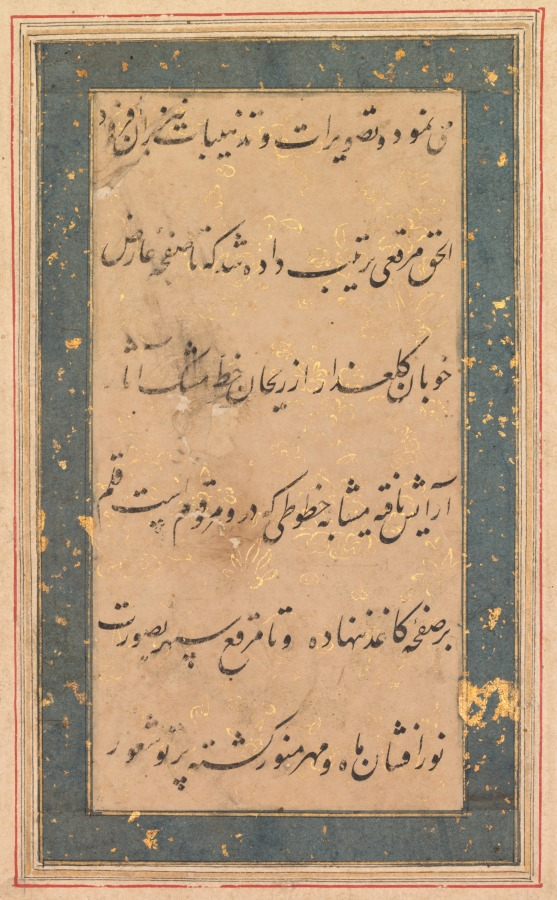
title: Calligraphy: Preface to the Anvar-i Suhaili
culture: Northern India, Mughal court, 16th century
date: c. 1590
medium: Gum tempera, ink, and gold on paper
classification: Calligraphy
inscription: Banyavati inscription in Devenagari script in left margin describing the subject of the miniature: 'We failed to understand each other when we were together, the understanding in that respect may come to us on being separated".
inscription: Persian text in nasta‘liq script: . . . and he also added illustrations and decorations and in truth an album was arranged that ever since the visage of rosy-cheeked beauties has been bedecked by their black sweet-smelling tresses, the like of the calligraphic lines that are written upon it have never been set upon any paper by a pen, and ever since the album of the sky has been illuminated by the luminosity of the moon and the sun, the light of the understanding . . .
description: The lovers have met in a remote wilderness location, away from the city shown in the distance. However, their affair has run its course, and they decide to part ways, each walking in opposite directions through an ominous landscape, where strange rock formations and an oversized serpent-slain by foxes gnawing on its innards-lend a sense of foreboding. As Mughal court painting developed into the last decades of the 16th century, artists began using increasingly muted colors and gentler shading techniques than they did in the more robust Adventures of Hamza at the left. The omission of a light source and shadows adds to a timeless, otherworldly impression to the landscape.